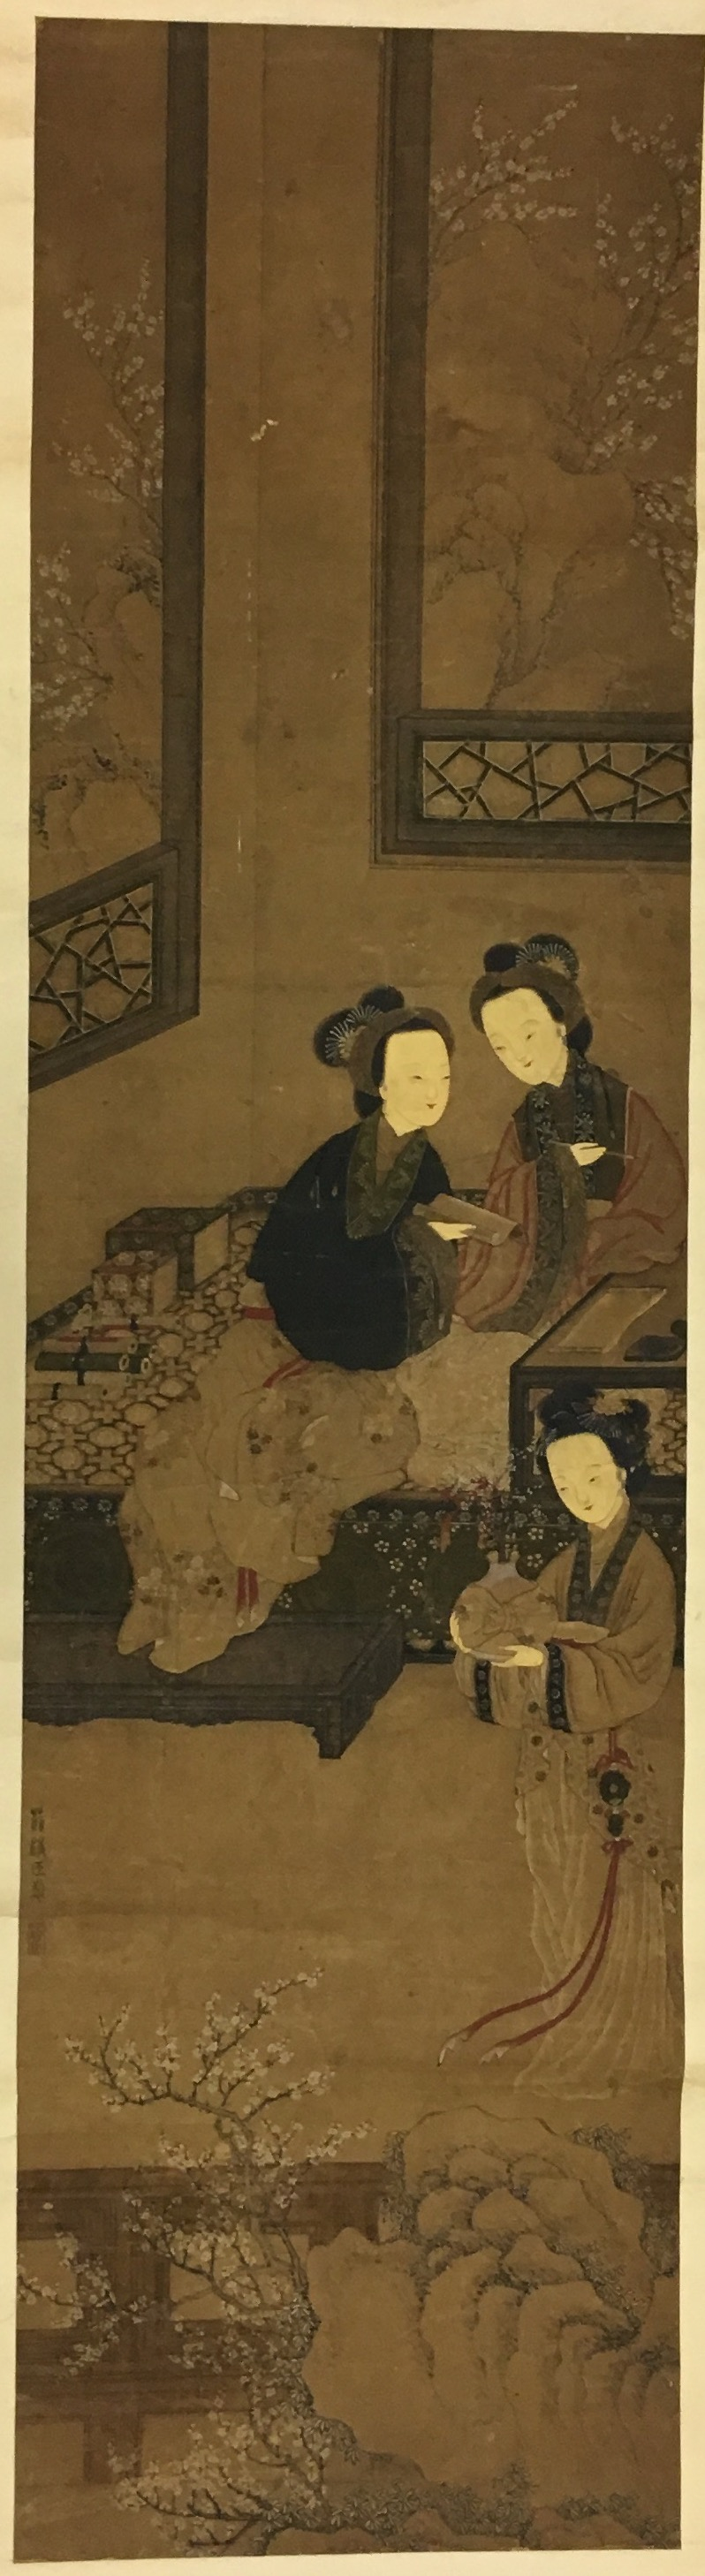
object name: Painting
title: Winter: Women Enjoying Writing, Reading, and Plum Blossoms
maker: Artist unknown (Chinese, 19th century)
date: Qing dynasty (1644–1911)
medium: Hanging scroll; color and gold on paper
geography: China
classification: hanging scroll; painting; asian art